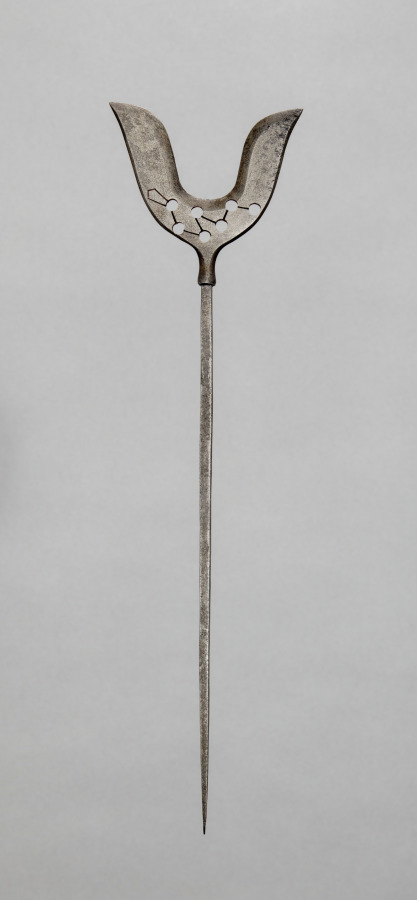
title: Arrow Head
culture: Japan, Edo period (1615–1868)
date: 1600s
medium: iron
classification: Arms and Armor